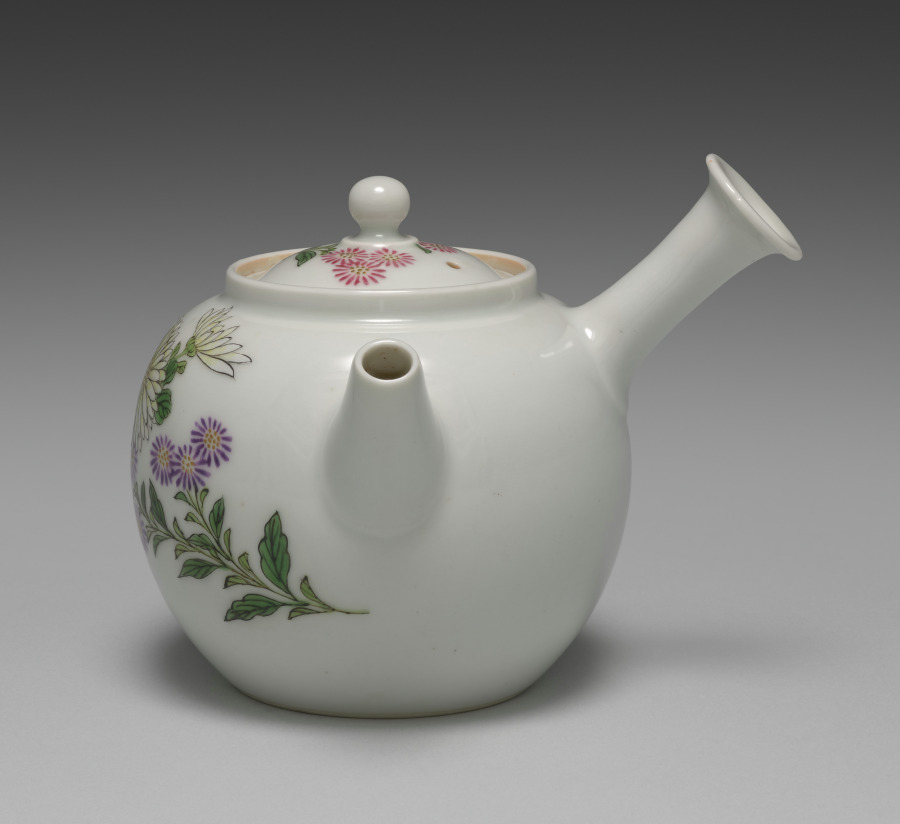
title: Teapot with Chrysanthemums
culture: Japan, Meiji period (1868–1912)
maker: Seifū Yohei III (Japanese, 1851–1914)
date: 1912–14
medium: Porcelian with overglaze enamel and gold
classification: Ceramic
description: This teapot with recessed lid has a bold, realistic design of pale yellow and white chrysanthemums rendered in overglaze color enamels and dotted gold centers. Black contour lines define the yellow and white flowers and their green stems and leaves. Small pink and purple chrysanthemums are rendered as simple motifs, their shapes defined in contrast to the white ground of the pot.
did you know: This side-handled teapot is designed for brewing and serving sencha.